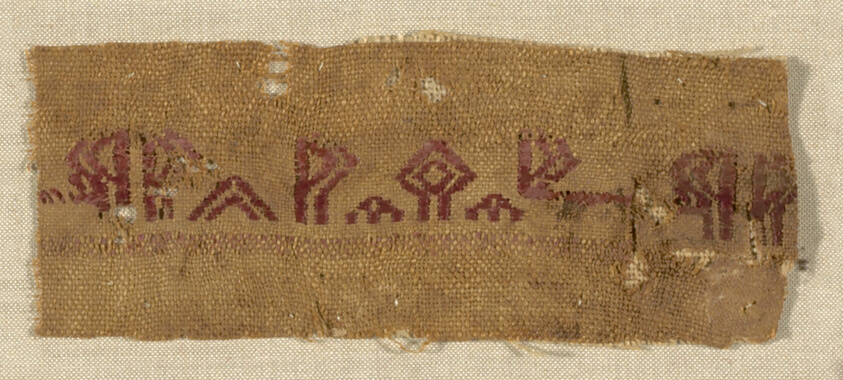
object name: Textile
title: Fragment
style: fatimid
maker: Egypt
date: Fatimid period (969–1171)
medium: Plain simple cloth; linen, brown with age; embroidered with red silk in satin stitch and darning stitch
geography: Egypt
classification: textile; weaving